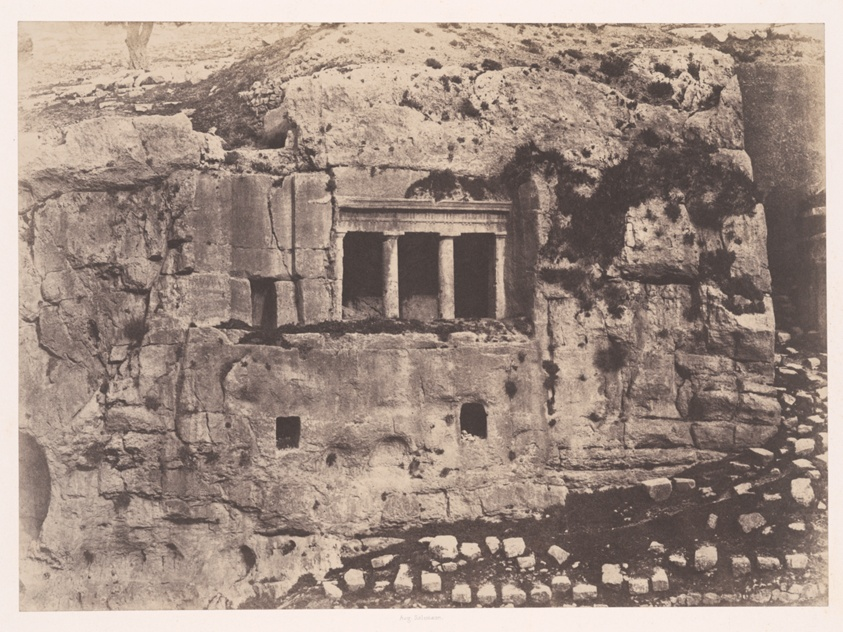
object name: Photograph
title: Jerusalem, Valley of Josaphat, Tomb of St. James (Jérusalem, Vallée de Josaphat, Tombeau de Saint Jacques)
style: 19th century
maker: Auguste Salzmann (French, 1824–1872)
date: 1854, printed 1856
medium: Salted paper print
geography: France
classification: salted paper print; photographic process; photography; photograph